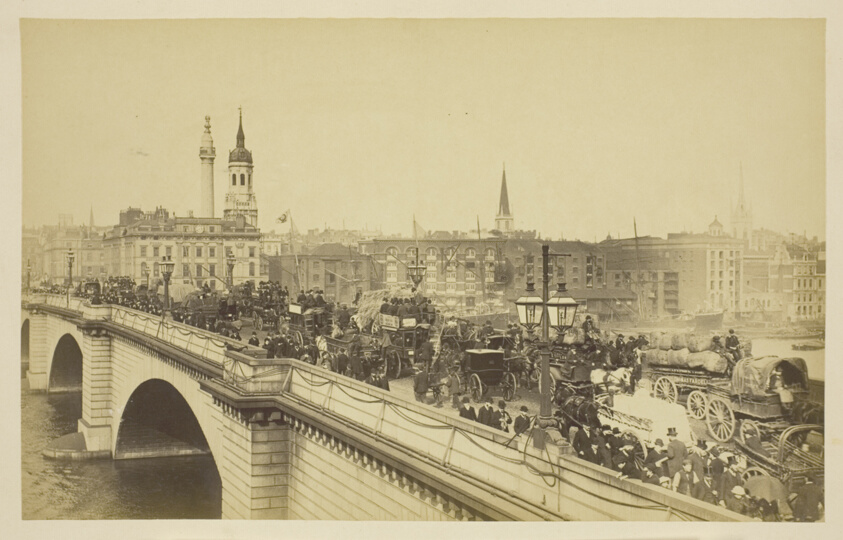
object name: Photograph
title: London Bridge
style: 19th century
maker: Artist unknown; probably English, 19th century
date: 1850–1900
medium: Albumen print, from the album "Views of London"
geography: England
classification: albumen silver print; photographic process; photography; photograph